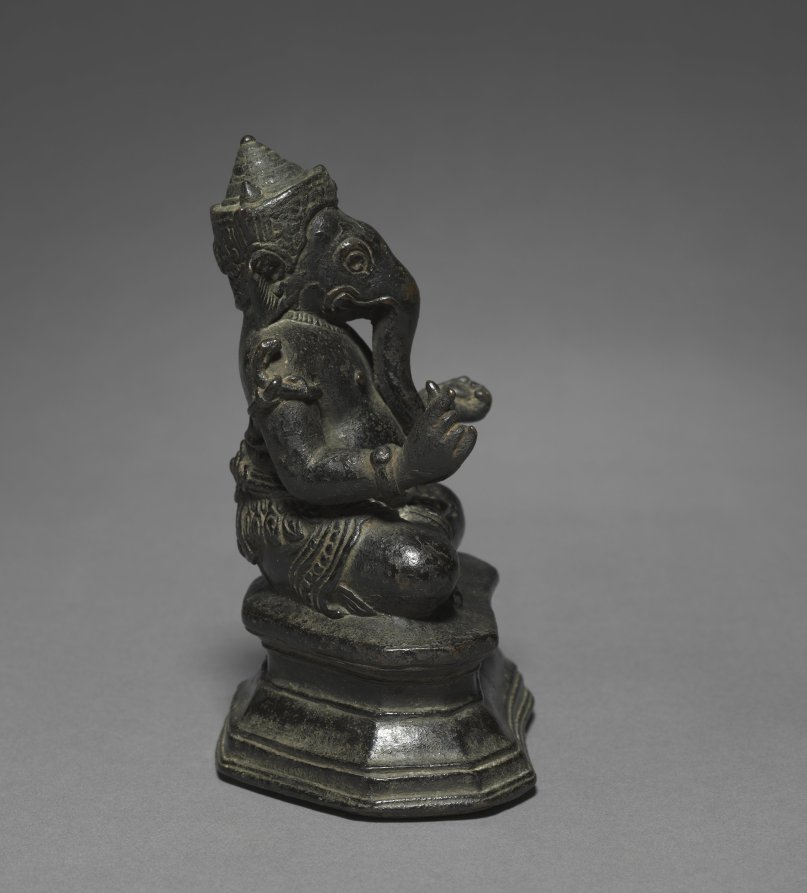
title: Seated Two-armed Ganesa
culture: Cambodia, Angkor Wat Period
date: late 1100s-early 1200s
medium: bronze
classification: Sculpture